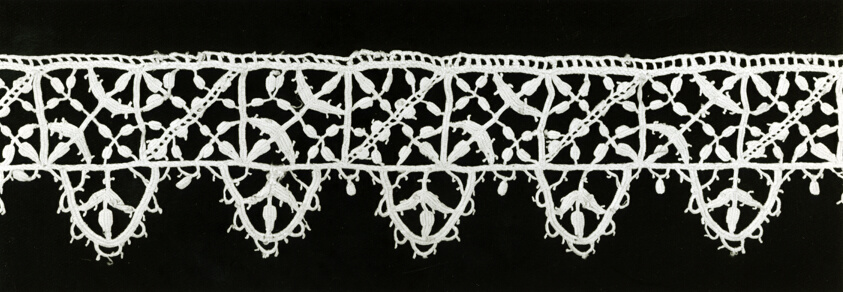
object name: Textile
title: Border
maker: Italy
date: 1601/25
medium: Linen, needle lace worked on a laid and plaited grid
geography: Italy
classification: textile; lace - needle